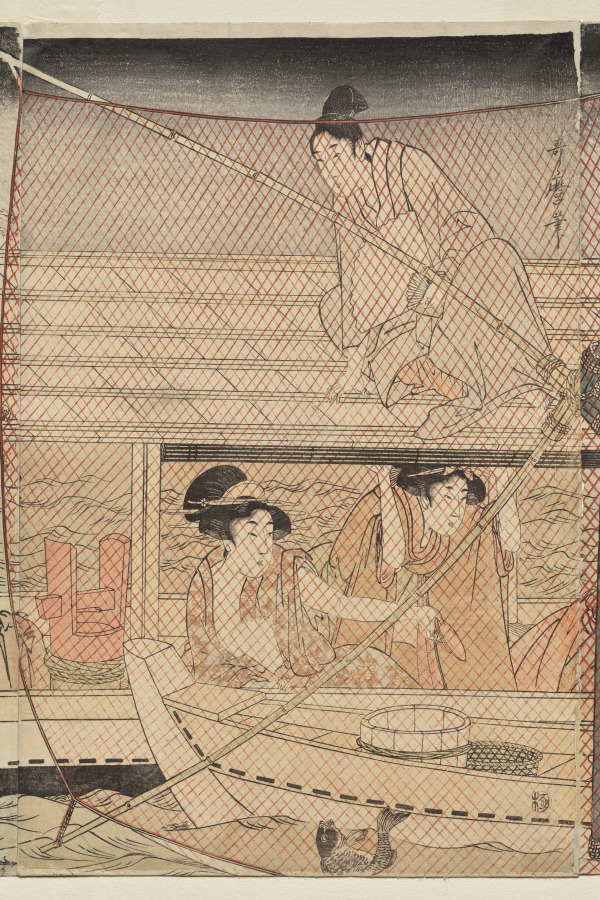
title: Net Fishing at Night on the Sumida River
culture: Japan, Edo period (1615–1868)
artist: Kitagawa Utamaro (Japanese, c. 1754–1806)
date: c. 1800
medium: One of a triptych of color woodblock prints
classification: Print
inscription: Signature: Utamaro hitsu Censorship Seal: kiwame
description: Pleasure-boating in the evening on the Sumida River to escape the summer’s heat was about as popular as viewing cherry blossoms in spring for Edo townspeople. The river also led the way to the Yoshiwara, the licensed brothel district. A boating party with courtesans and gentlemen jostles up next to a fishing boat. Utamaro enjoyed portraying a scene through the design of a fishing or mosquito net. The different colors of the net suggest these impressions may be from two different series.